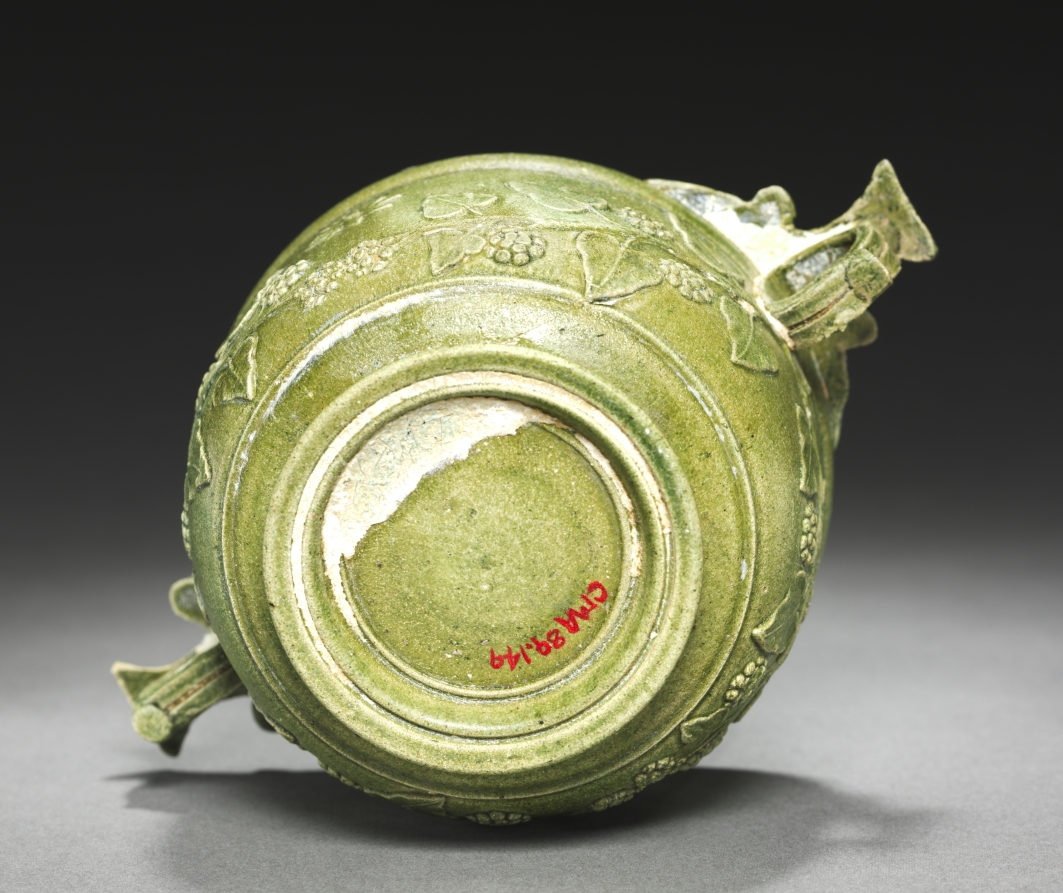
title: Skyphos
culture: probably Turkey, Roman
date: 1–100 CE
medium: earthenware with slip decoration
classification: Ceramic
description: Lead glaze was first used near the Mediterranean basin around 1000 bc, appearing in Mesopotamia and Egypt almost simultaneously. The technique flourished during the Roman Empire, and examples can be found in all reaches of the realm from England and Germany to North Africa, Syria, and Turkey, and perhaps even further east. This is a very fine example of this technique.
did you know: Lead glaze is what gives this wine cup its yellowish-green color.